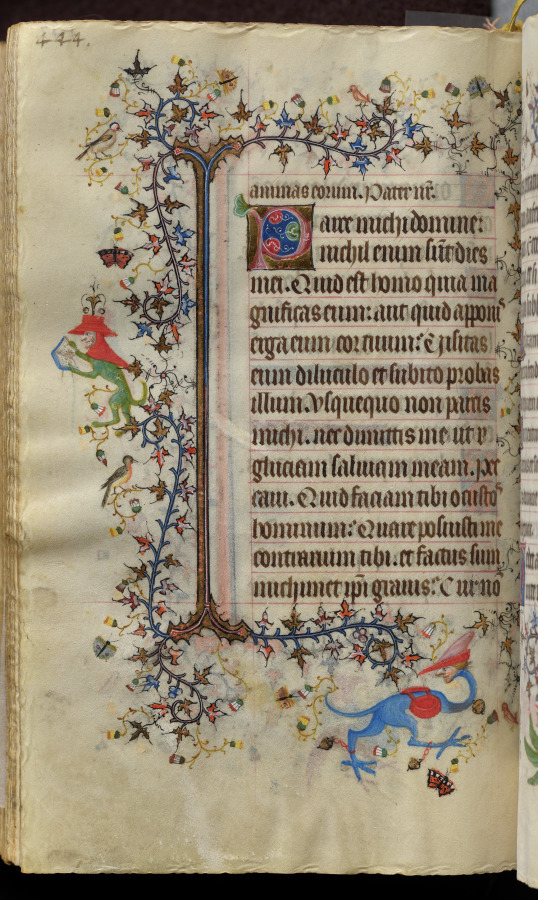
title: Hours of Charles the Noble, King of Navarre (1361-1425): fol. 216v, Text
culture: France, Paris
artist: Master of the Brussels Initials and Associates (French)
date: c. 1405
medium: ink, tempera, and gold on vellum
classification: Bound Volume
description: This precious volume was obviously highly prized by its owner, the French-born King of Navarre, who had his coat of arms painted on no less than twenty folios. Rather than directly commissioning this manuscript from a specific workshop, it seems that Charles the Noble acquired his book of hours -- perhaps ready-made for the luxury market -- while on a trip to Paris in 1404-05. A collaborative effort, six painting styles are evidenced within the pages of this codex, those of two Italians, two Frenchmen, and two Netherlanders. The painter who was responsible for the planning and decoration of the book, and who produced seventeen of the large miniatures, was a Bolognese artist known as the Master of the Brussels Initials. His principal assistant, responsible for most of the borders, was a Florentine who signed his name "Zecho" da Firenze on folio 208 verso.